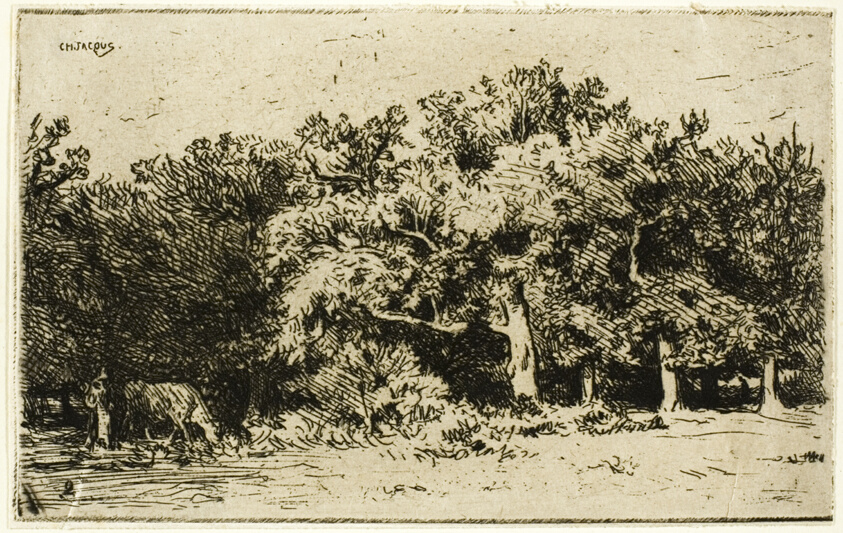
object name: Print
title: A Part of the Forest of Fontainebleau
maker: Charles Émile Jacque (French, 1813-1894)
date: 1849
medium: Etching and drypoint on ivory chine laid down on ivory laid paper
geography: France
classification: etching; print; prints and drawing